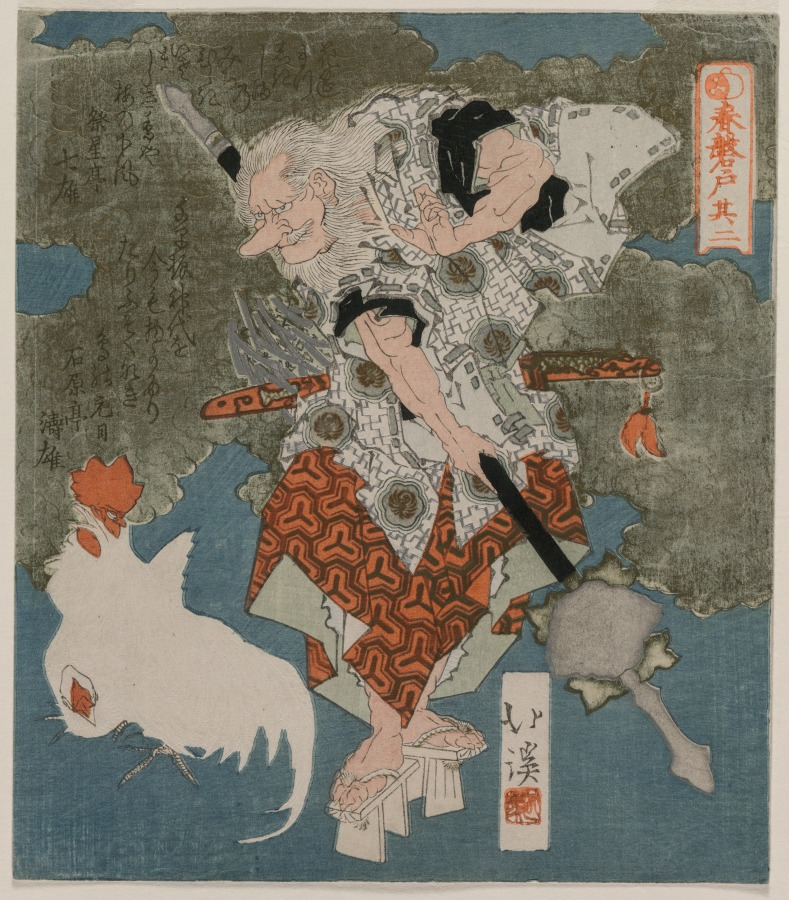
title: Sarutahiko from The Cave Door of Spring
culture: Japan, Edo period (1615–1868)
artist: Totoya Hokkei (Japanese, 1780–1850)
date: 1825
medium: Second from a pentaptych of woodblock prints; ink and color on paper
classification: Print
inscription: Signature: Hokkei Seal: Hokkei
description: These elegant surimono prints come from a set of five images inspired by the legend of the Shinto Supreme Sun Goddess, Amaterasu. She was once so offended by her brother that she retreated to a cave, leaving the earth in darkness. Several attempts to lure her out with cocks crowing, music-making, and a goddess dancing failed, but a mirror hung from a nearby tree made Amaterasu curious, bringing her to the entrance of the cave. A stone was quickly placed at the entrance to block her way back into the cave, and light was restored to the world. Each print is set against a blue evening sky with embossed clouds enriched with gold, silver, and copper.